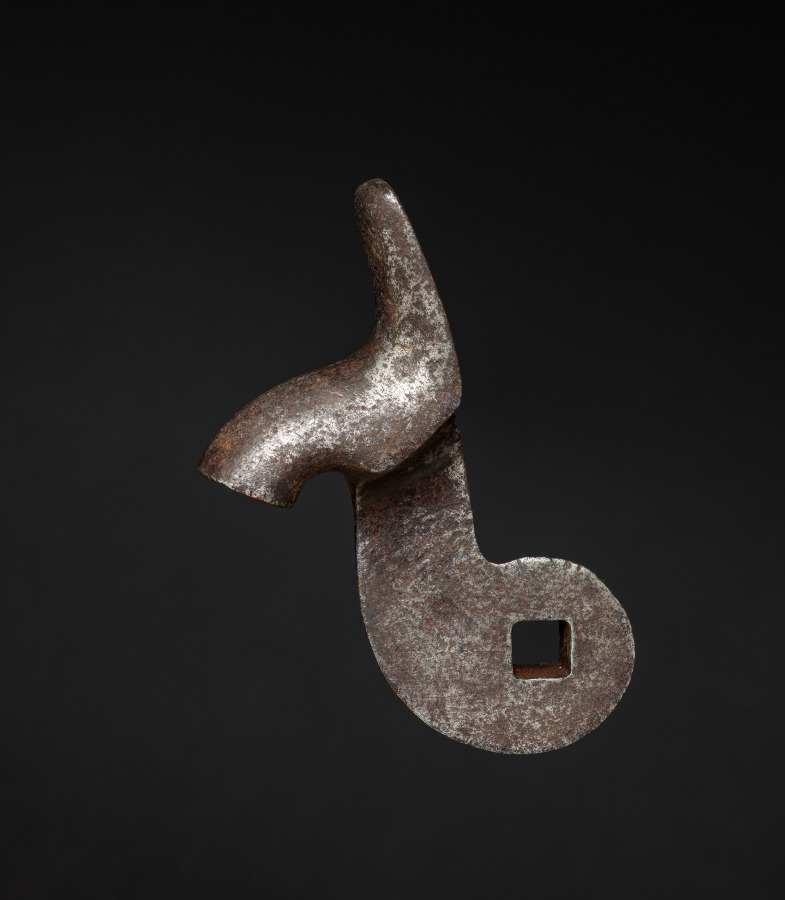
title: Gun-Lock Hammer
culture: England, early 19th century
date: c. 1800–1825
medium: steel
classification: Arms and Armor